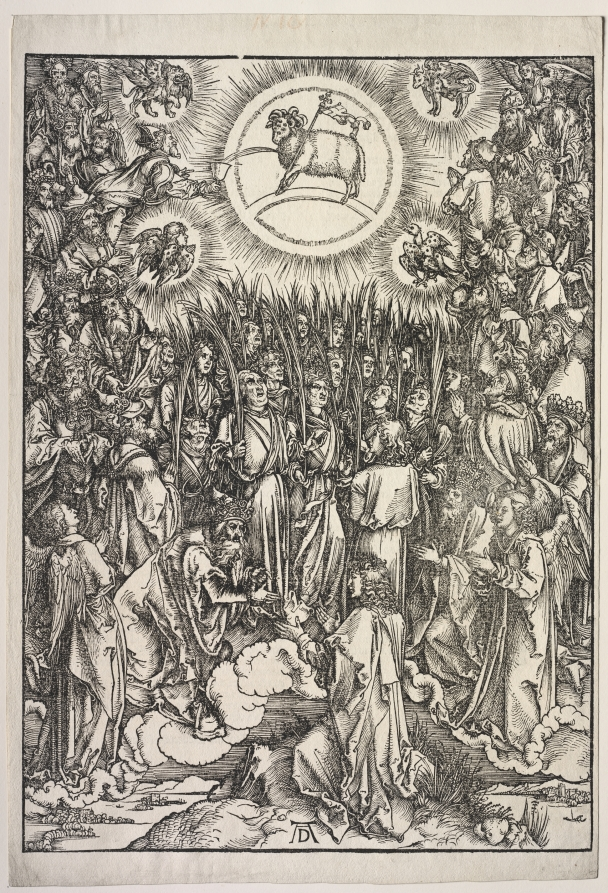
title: Revelation of St. John: The Adoration of the Lamb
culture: Germany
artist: Albrecht Dürer (German, 1471–1528)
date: 1511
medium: woodcut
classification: Print